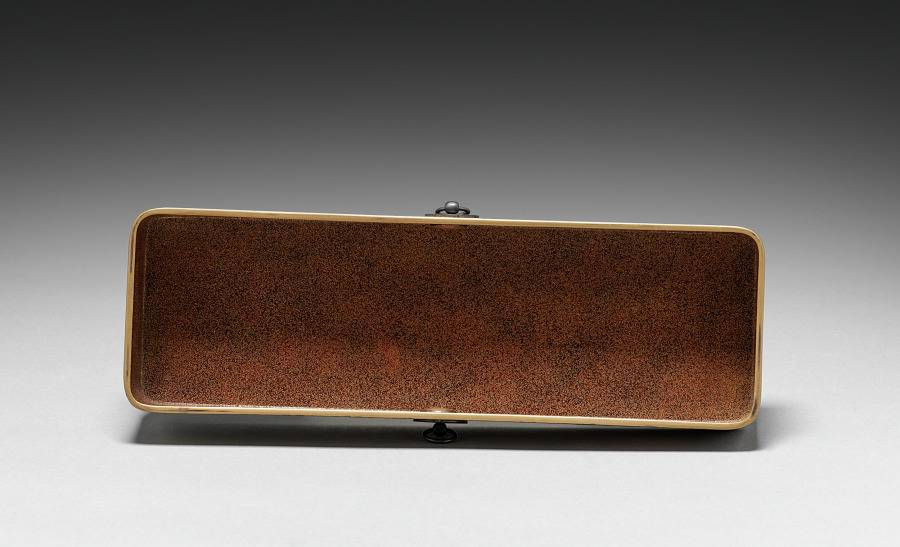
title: Letter Box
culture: Japan, Edo period (1615–1868)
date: 1615–1868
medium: lacquer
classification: Lacquer